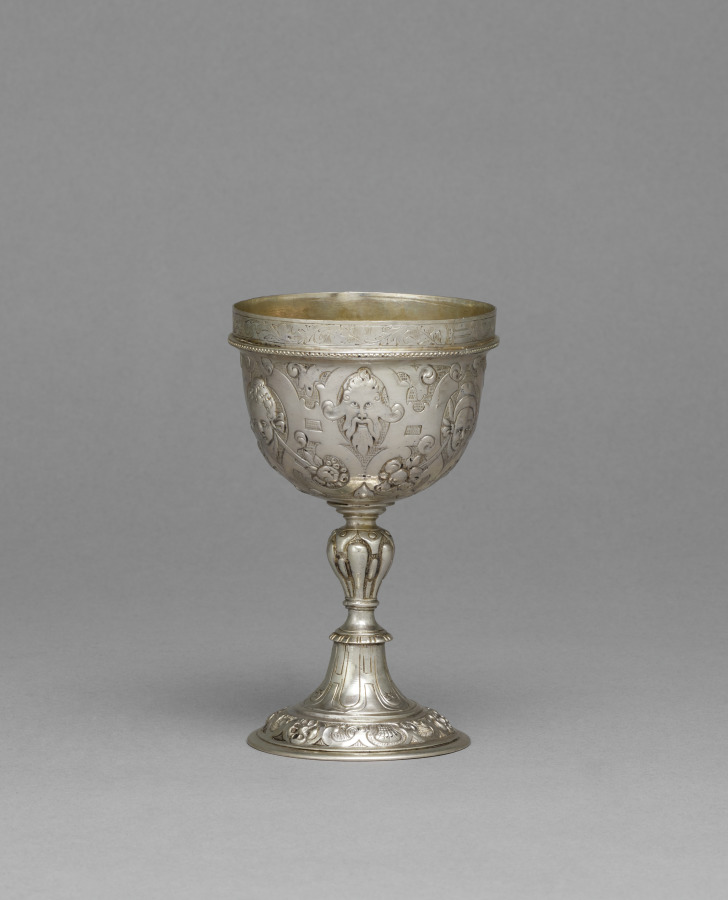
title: Bridal Cup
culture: Germany, Nuremburg(?), 17th century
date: c. 1600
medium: silver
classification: Silver